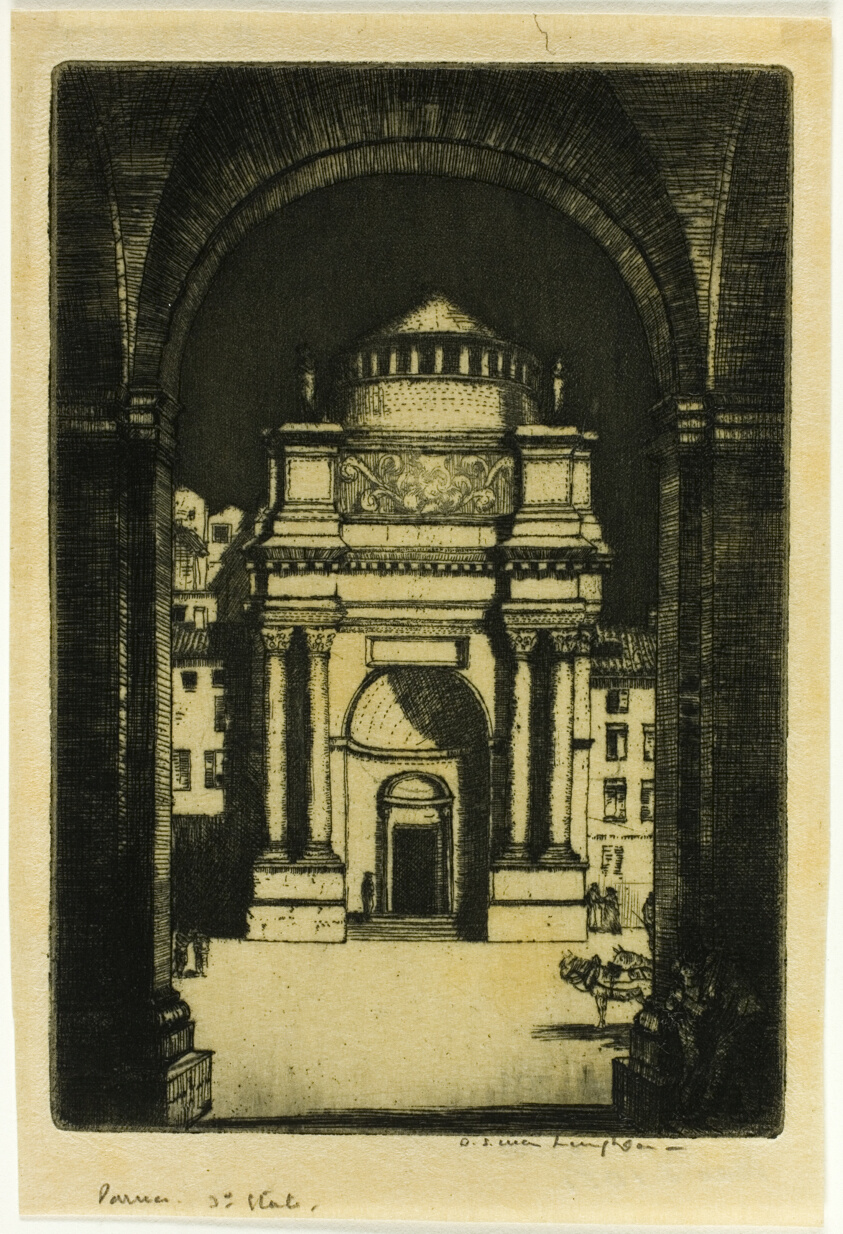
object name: Print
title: Parma, Italy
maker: Donald Shaw MacLaughlan (American, born Canada, 1876-1938)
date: 1904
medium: Etching in black on cream wove paper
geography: United States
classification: etching; print; prints and drawing